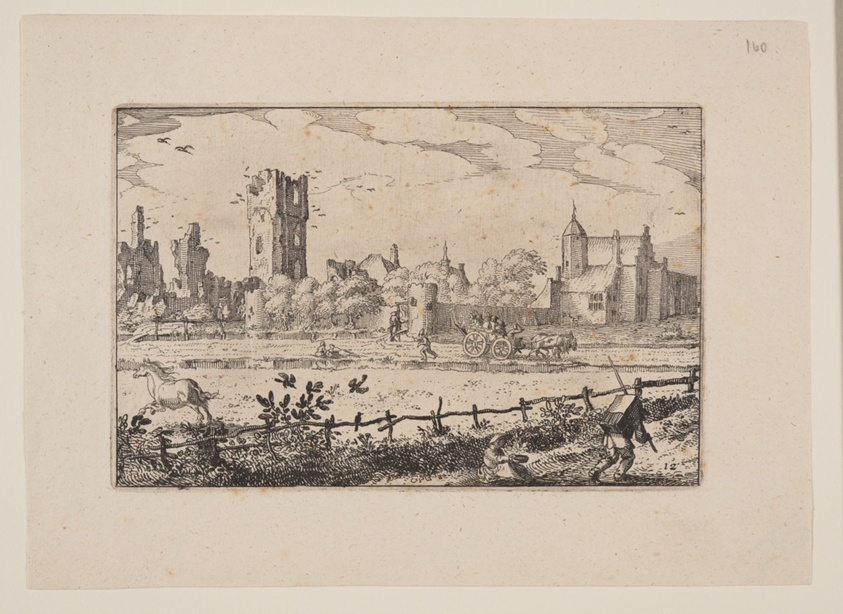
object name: Print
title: Het Huis te Cleef, near Haarlem, from Views in the Surroundings of Haarlem (Plaisante Plaetsen)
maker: Claes Jansz. Visscher (Netherlandish, c. 1550–c. 1612)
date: 1610/20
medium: Etching on ivory laid paper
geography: Netherlands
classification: print; paper; prints and drawing; etching